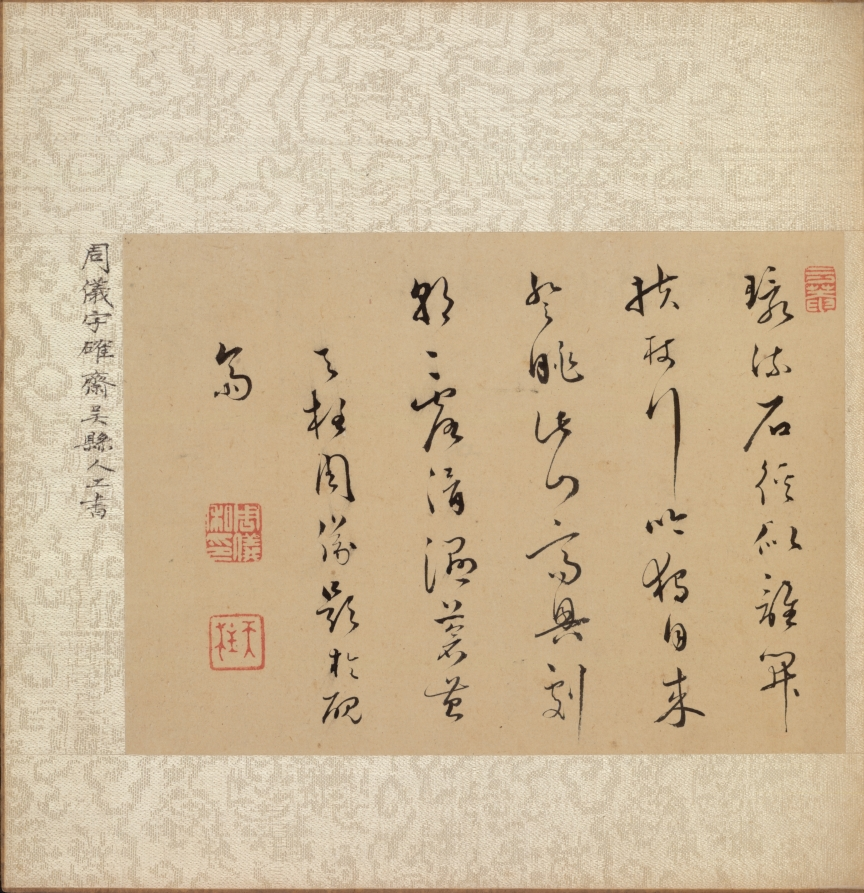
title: Album of Miscellaneous Subjects, Leaf 5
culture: China, Qing dynasty (1644-1911)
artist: Fan Qi (Chinese, 1616–after 1694)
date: early 1650s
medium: album leaf, ink and color on silk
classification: Painting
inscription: Artist seal: Fan Qi 樊圻. Poem by Zhou Yi 周儀 (mid 17th century–about 1705): That stone path surrounded by streams - for whom was it created?/ Leaning on my staff, I walk and hum, arriving alone./ As soon as I ascend to gaze at these mountains, my happiness increases,/ Every morning the moistening dew makes slippery the green moss.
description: Fan Qi's painting on the fifth leaf evokes Zuo Si's poetic line: I shake my robe atop the cliff of thousand ren. The calligraphy by Zhou Yi adjacent to the painting reads: That stone path surrounded by streams—for whom was it created? Leaning on my staff, I walk and hum, arriving alone. As soon as I ascend to gaze at these mountains, my happiness increases, Every morning the moistening dew makes the green moss slippery.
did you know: Barren tree branches on the peak and the bushes' reddish foliage give the scene an autumnal feel.